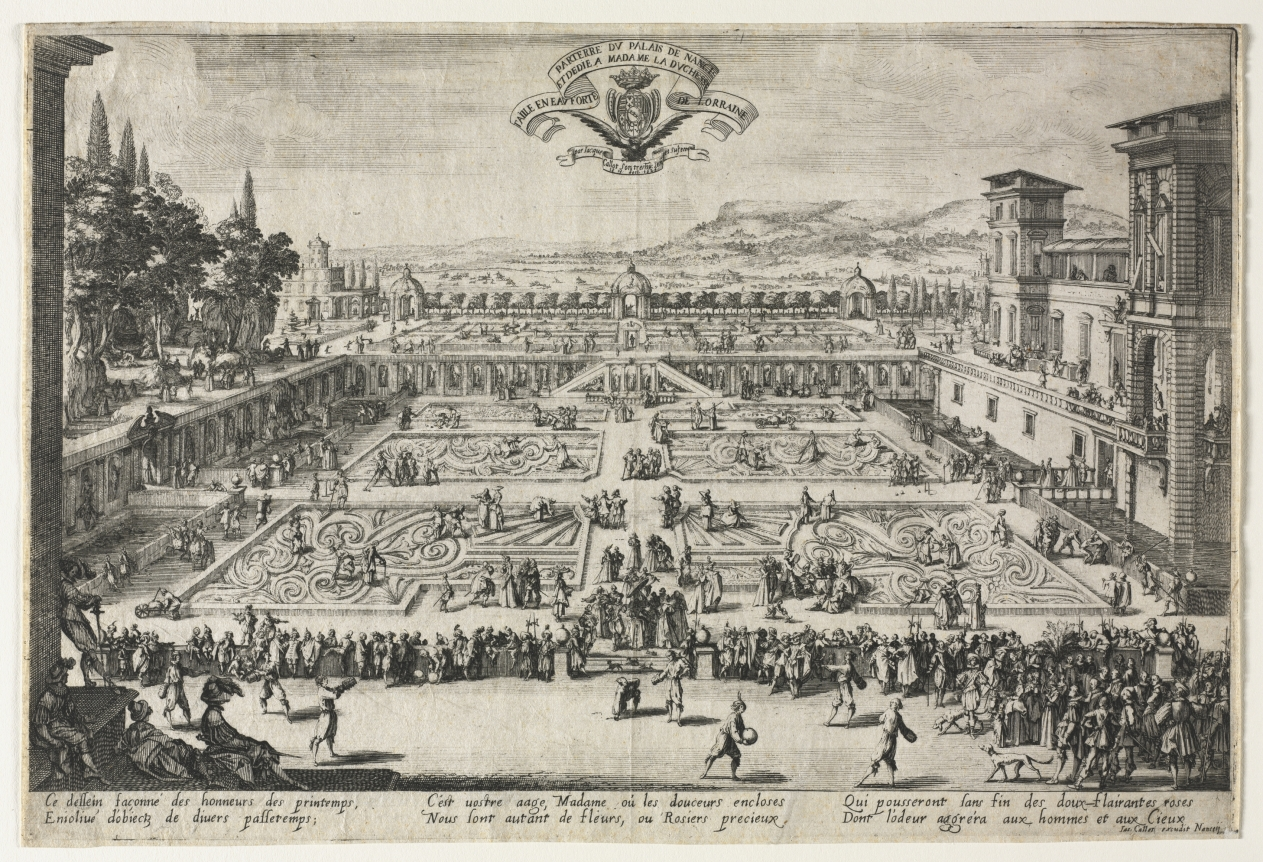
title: The Palace Gardens at Nancy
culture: France, 17th century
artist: Jacques Callot (French, 1592–1635)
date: 1625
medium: etching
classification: Print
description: Callot's etching shows the appearance of the garden at the ducal palace at Nancy in 1625. Female figures carrying baskets on their heads are pictured so that Bellange's etchings of gardeners balancing ornate, fanciful containers must have been based on reality.